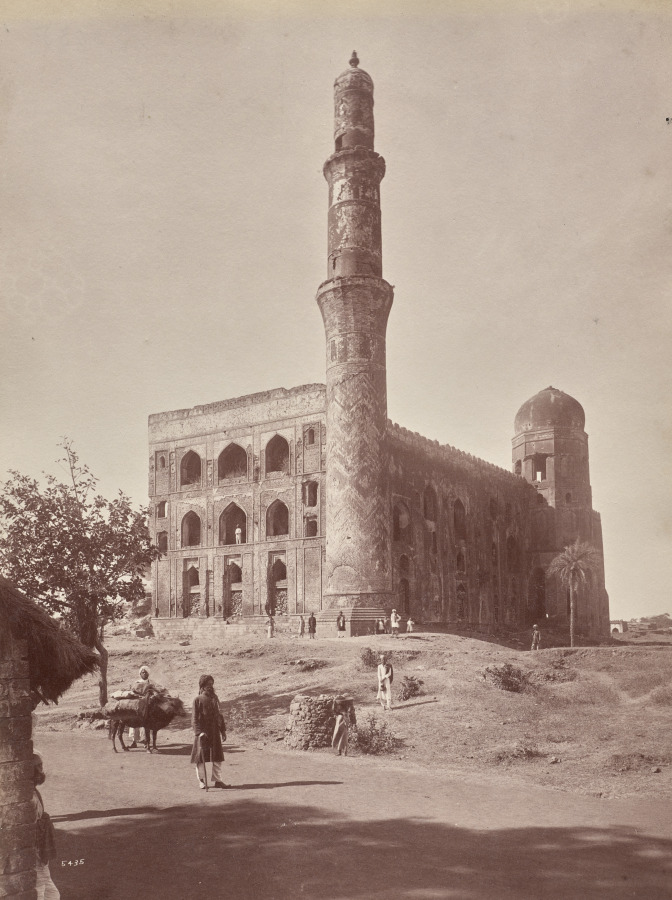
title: Mahmud Gawan Madrasa, Bidar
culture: India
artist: Raja Deen Dayal (Indian, 1844–1905)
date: c. 1890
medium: albumen print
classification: Photograph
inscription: Inscription lower left: "5435"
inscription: inscription along left edge of support: "Bidar Deccan the Madrassa Nov. ’97"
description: The architectural decoration on the tower echoes patterns on Bidri ware (see 2020.206), ornamented metallic vessels cast from condensed vapors of zinc in a technique native to that city. This image is notable for the precision and poetry with which the people are posed. Most gaze at the camera, probably instructed to do so by Deen Dayal; this is rarely the case in images by foreign photographers.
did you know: Built in 1472 as an Islamic theological college, in 1656 gunpowder stored in it ignited and gutted the building.